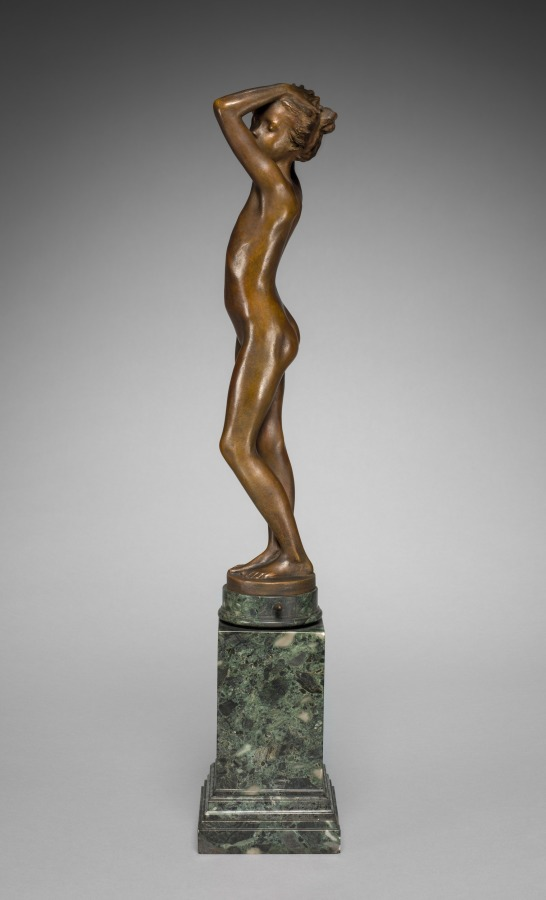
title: Eva, Study of a Nude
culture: America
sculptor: Emil Fuchs (American, born Austria, 1866–1929)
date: 1913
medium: bronze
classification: Sculpture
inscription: Signed on base: EMIL FUCHS 1913